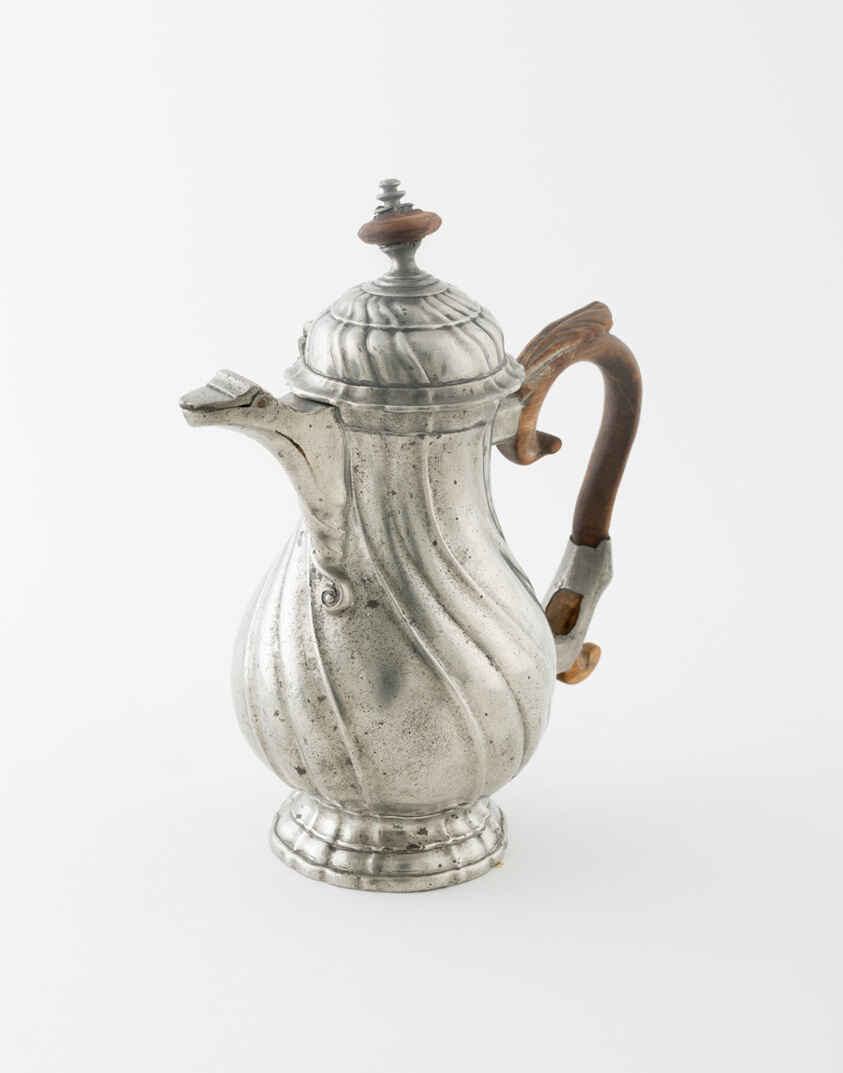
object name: Metalwork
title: Small Coffee Pot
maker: Probably Frankfurt, Germany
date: Mid 18th century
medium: Pewter and wood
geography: Frankfurt am Main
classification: pewter; metalwork; european decorative arts